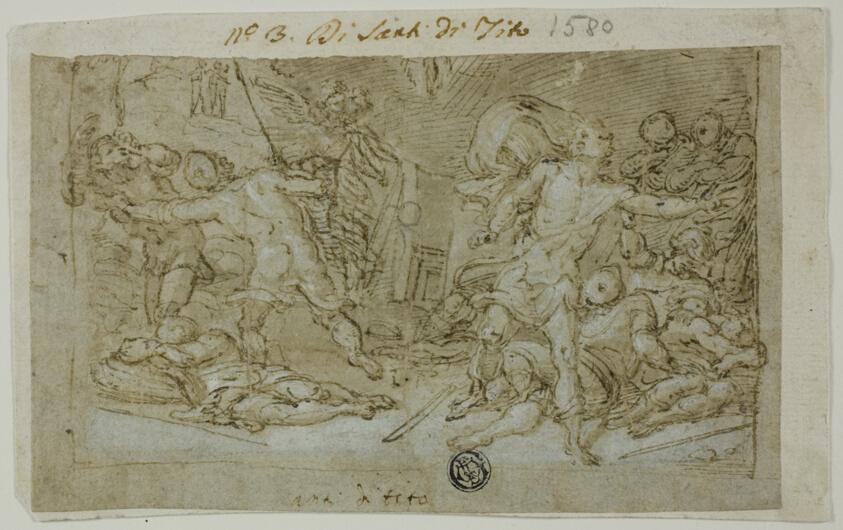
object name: Drawing and Watercolor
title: Study for the Resurrection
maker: Santi di Tito (Italian, 1536-1603)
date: c. 1574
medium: Pen and brown ink with brush and brown wash, heightened with lead white, with later addition in graphite at center, on blue laid paper, laid down on ivory laid paper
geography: Italy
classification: ink with wash; drawings (visual works); prints and drawing